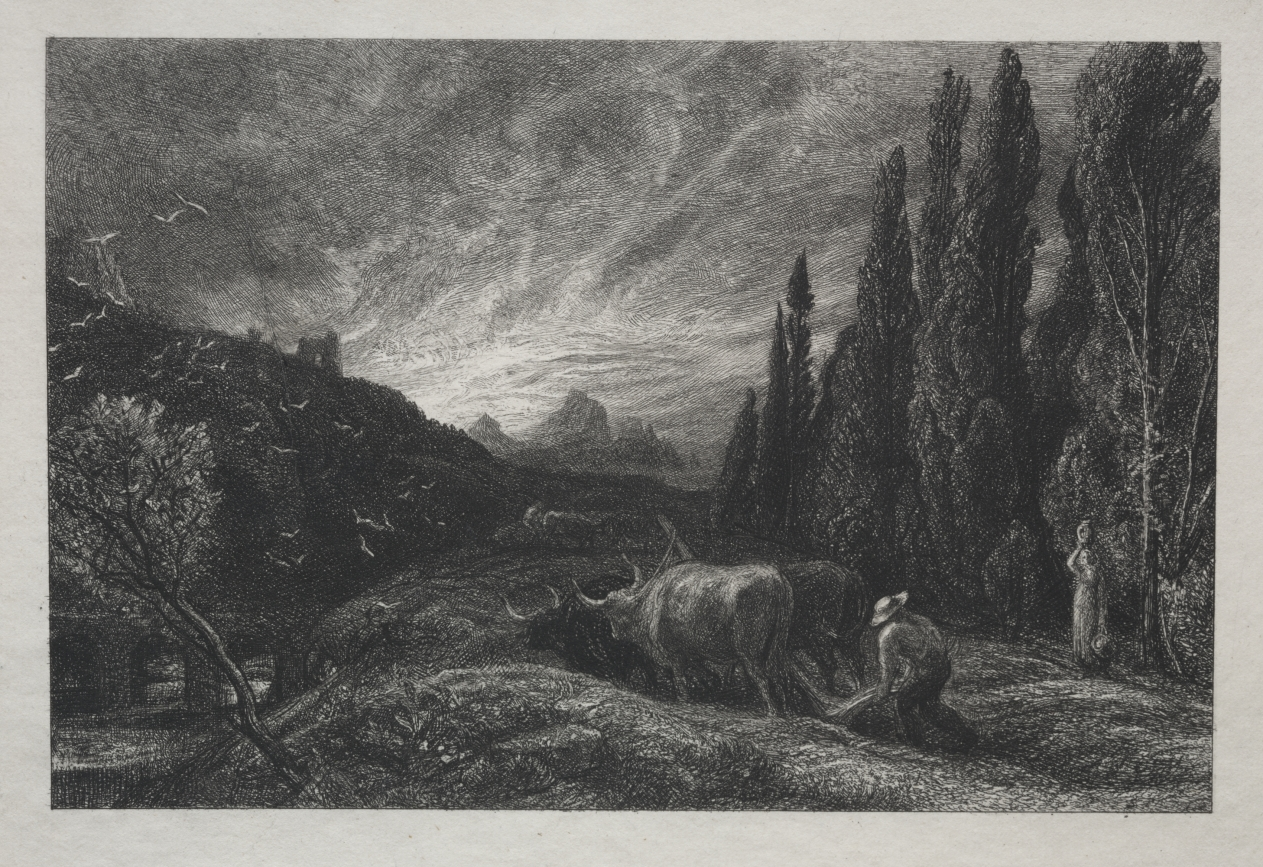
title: The Early Plowman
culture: England, 19th century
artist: Samuel Palmer (British, 1805–1881)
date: before 1861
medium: etching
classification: Print